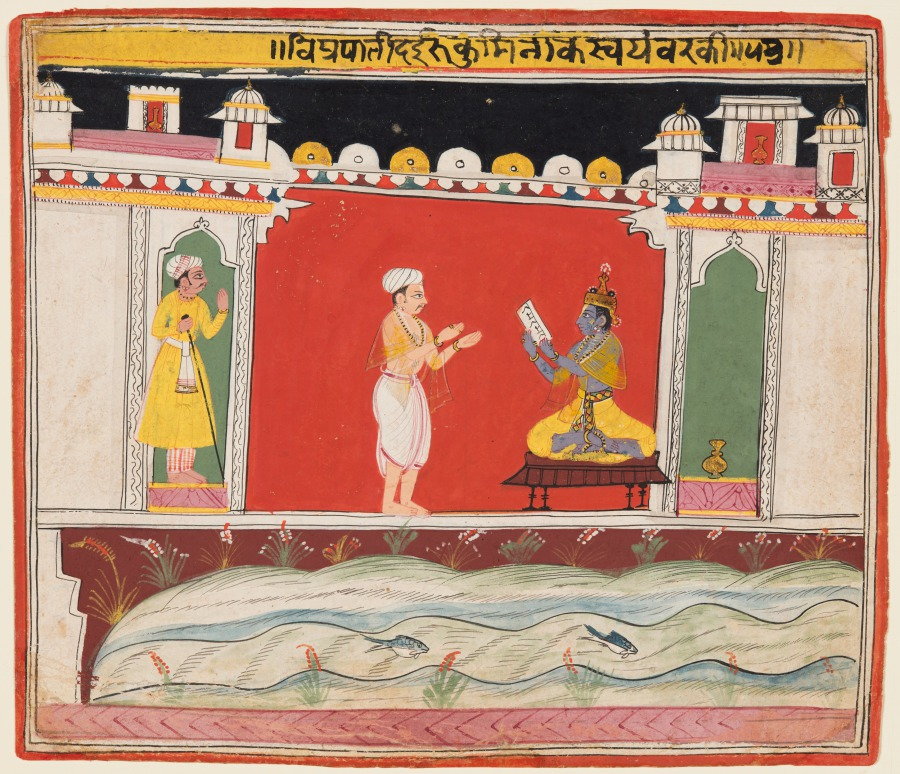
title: A Brahmin gives Krishna the Message or Invitation for the Competition to Rukmini’s Svayamvara, from a Bhagavata Purana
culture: Central India, Madhya Pradesh, Malwa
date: c. 1650–60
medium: Gum tempera and gold on paper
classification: Painting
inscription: vimra pātī daī rukumanī ke svayaṃvara ki, 53.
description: Sitting on a stool in a palatial setting, Krishna receives a letter, inviting him to participate in a ceremony called a svayamvara, in which an unmarried woman who has come of age selects a husband. Krishna will later elope with the princess Rukmini. This scene takes place in Krishna’s western palace of Dvaraka, by the ocean, which is depicted with waves and fish at the bottom of the page.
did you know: The letter in Krishna’s hand repeats the name of “Rama,” another incarnation of Vishnu.